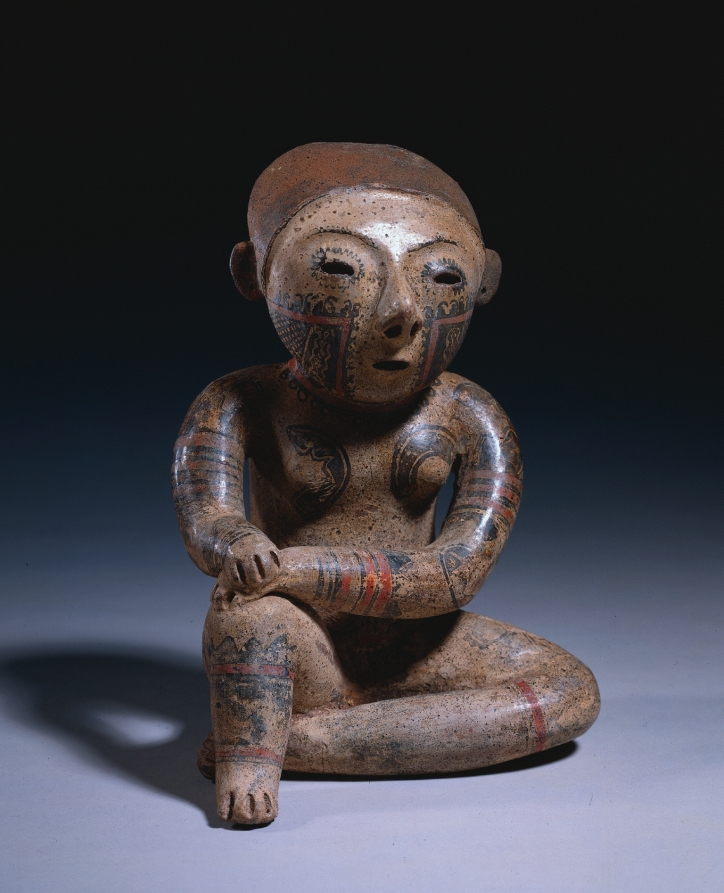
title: Seated Female Figure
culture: Mexico, Nayarit, Chinesco Style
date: c. 100 BCE–300 CE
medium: earthenware with burnished, colored slips and resist patterning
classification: Sculpture